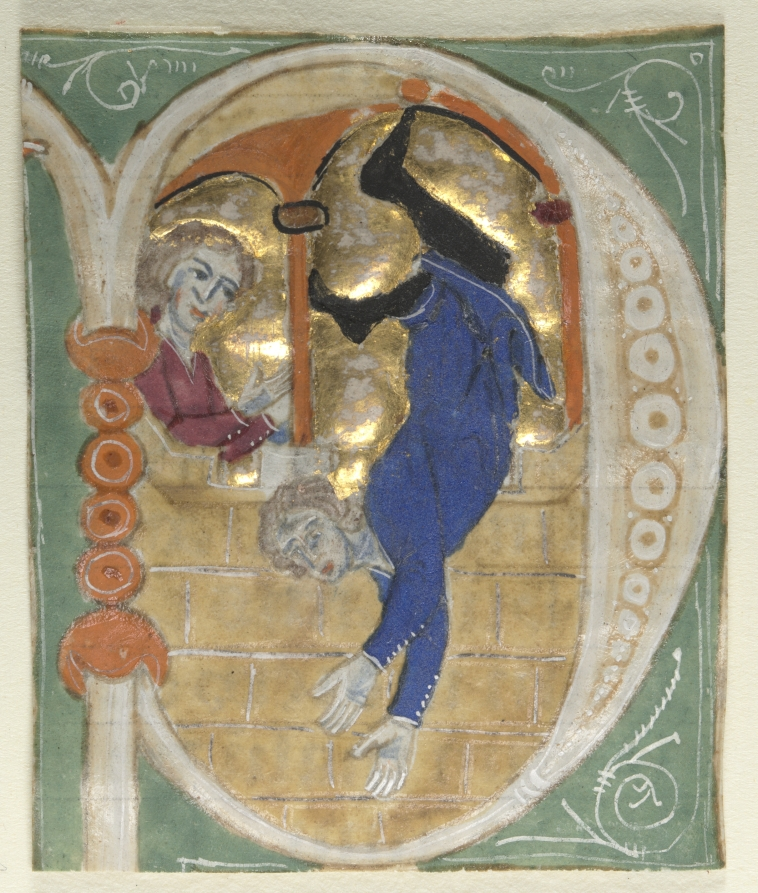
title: Historiated Initial (P?) Excised from a Bible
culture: Italy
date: 1200s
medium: tempera and gold on parchment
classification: Manuscript